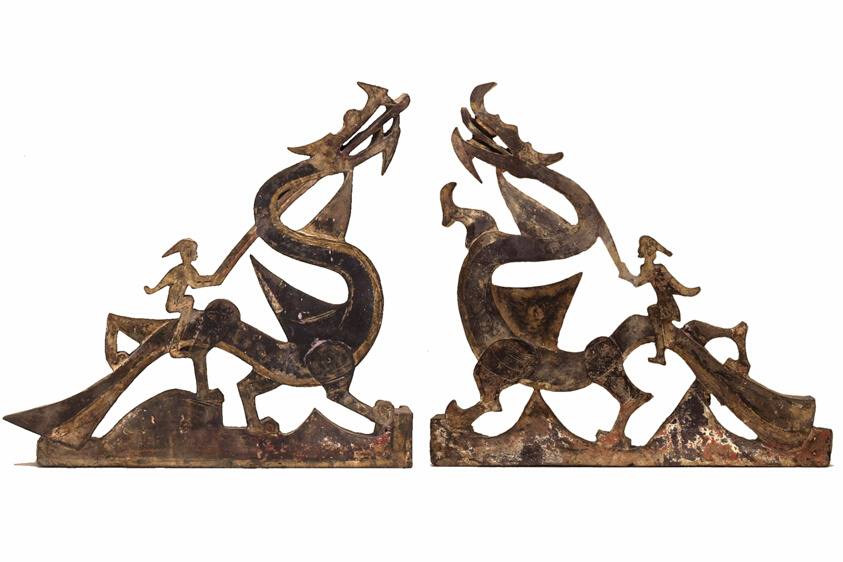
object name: Architectural fragment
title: Immortals Riding Dragons: Sections of a Tomb Pediment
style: Chinese (culture or style)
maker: China; probably from Henan province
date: Han dynasty (206 BCE– 220 CE), 1st century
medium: Gray earthenware with traces of slip and polychrome pigments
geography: China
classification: ceramics; sculpture; asian art; architectural fragment